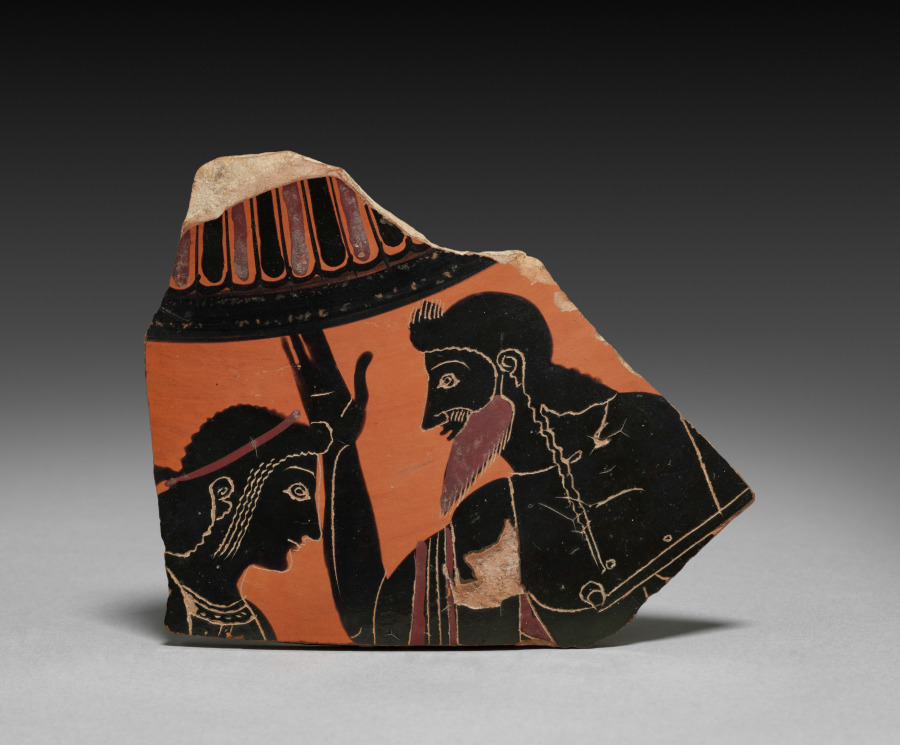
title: Fragment from Black-Figure Neck-Amphora of Panathenaic Shape (Storage Vessel): Apollo and Zeus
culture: Greek, Attic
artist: manner of Antimenes Painter (Greek, Attic, active c. 530–510 BCE)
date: c. 520 BCE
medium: ceramic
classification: Ceramic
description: Comparison with better-preserved vases—and with other artworks and monuments, such as the famous Siphnian Treasury at Delphi—helps to fill in some of the action no longer surviving from the rest of this vase, which once showed Apollo and Herakles struggling for the Delphic tripod. One claw-footed leg of the tripod survives, across the chest of Zeus, the bearded figure who intervened to stop the quarrel between two of his sons. Apollo is the unbearded figure at left, while Herakles would have appeared beyond the break on the right.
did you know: The claw-footed tripod leg before Zeus's chest identifies the scene—the struggle for the Delphic tripod.